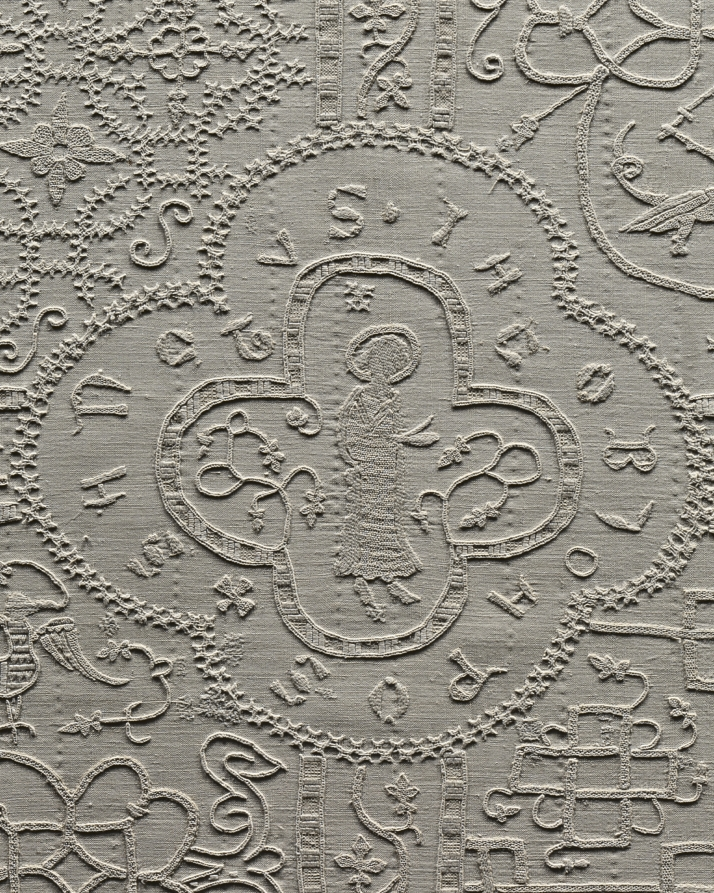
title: Altar Cloth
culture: Germany, Altenberg on the Lahn, Premonstratensian Convent, 14th century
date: c. 1350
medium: embroidery: linen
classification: Embroidery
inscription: various motifs enclosed in quatrefoils with identifying inscriptions in Gothic letters.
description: This large, embroidered altar cloth is one of the rarest, most important medieval church furnishings in existence. It was stitched by nuns in the Premonstratensian Convent in Altenberg on the Lahn River, north of Frankfurt, Germany, and was used to cover the church’s high altar in the weeks leading up to Easter. The cloth is an example of linen embroidery, a specialty of German nuns in the later Middle Ages. The Altenberg monastery church once had valuable furnishings; the high altar retable (a decorated frame with sculptures and paintings on the top of an altar) has survived, the main parts of which are now in the Städel Museum in Frankfurt, Germany.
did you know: When lit from behind, the previously hidden details emerge and the complex design becomes evident.